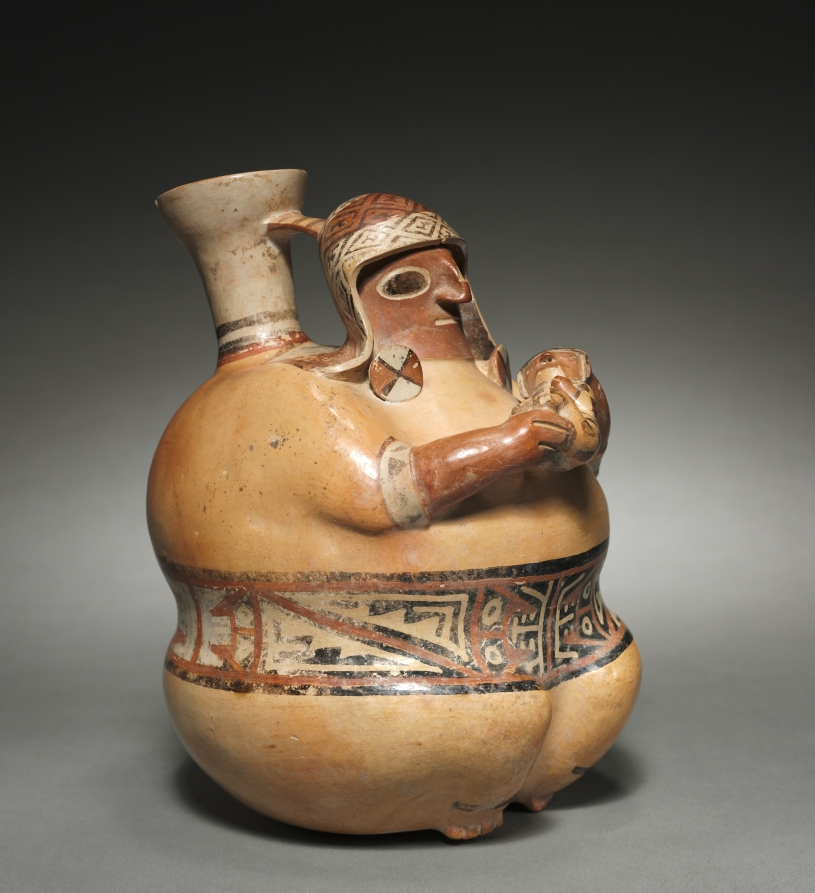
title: Mother-and-Child? Vessel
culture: Central Andes, North Highlands, Recuay people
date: 1–700 CE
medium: ceramic, slip, pigment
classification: Sculpture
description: Well-dressed, important women like this one are depicted fairly often in Recuay art. These women hold a variety of things, ranging from cups that may refer to feasts held on important political occasions to small figures commonly interpreted as children, as here. These and other representations have led scholars to suggest that Recuay women held authority independent of their male partners; their authority may have stemmed in part from involvement in feasting celebrations.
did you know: Recuay ceramics typically use only three colors: black, white, and red.